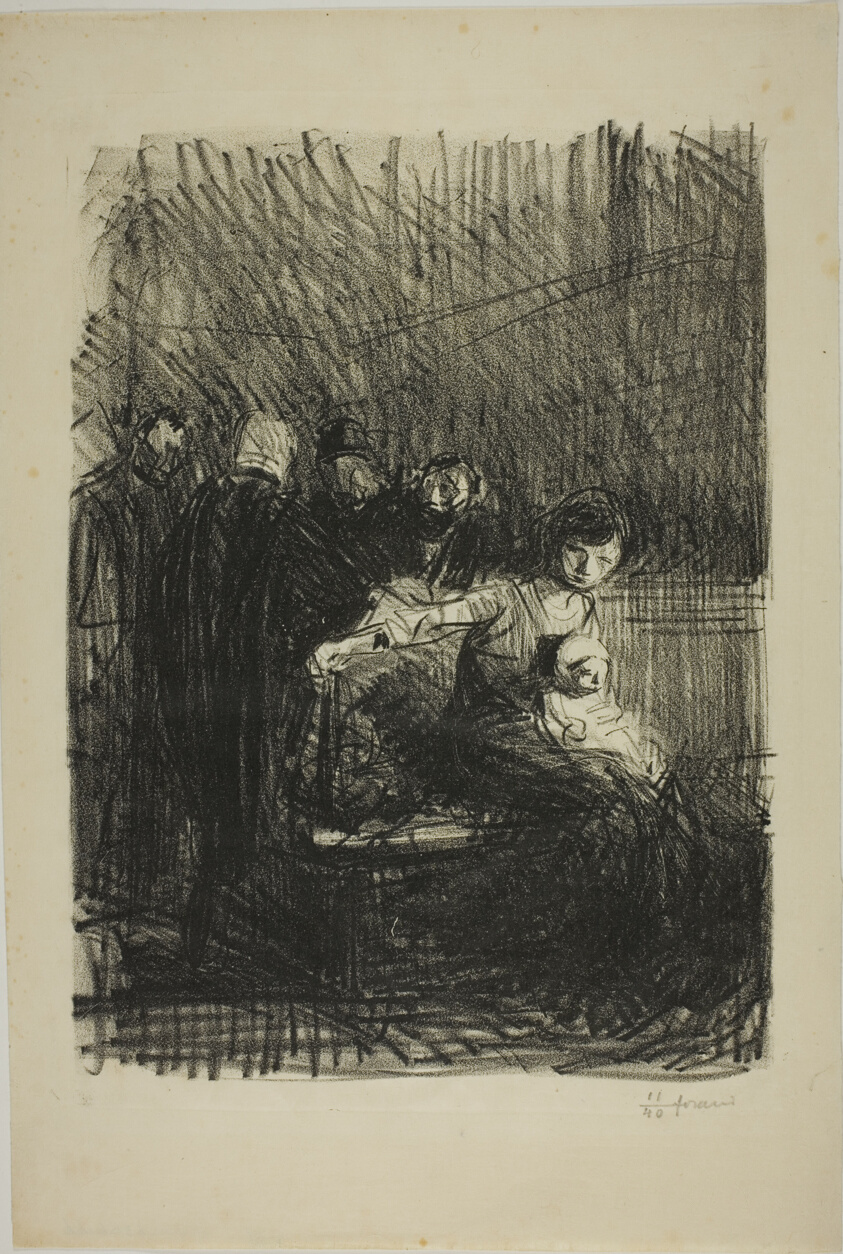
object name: Print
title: Recess of the Hearing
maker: Jean Louis Forain (French, 1852-1931)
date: July 1914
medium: Lithograph on cream Japanese paper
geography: France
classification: lithograph; print; prints and drawing